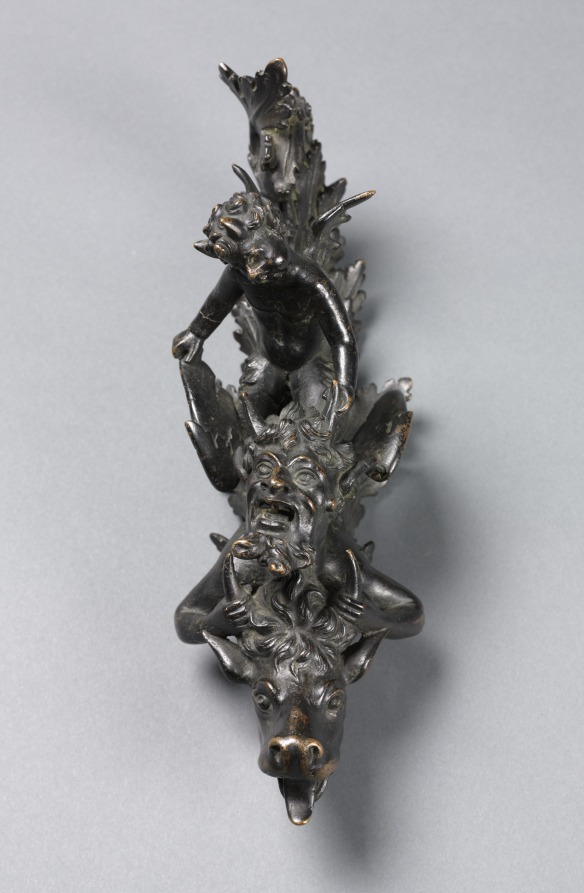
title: Doorknocker with Two Satyrs Riding an Ox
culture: probably Italy, Style of Padua, 16th Century, 19th century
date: 1800s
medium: bronze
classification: Sculpture